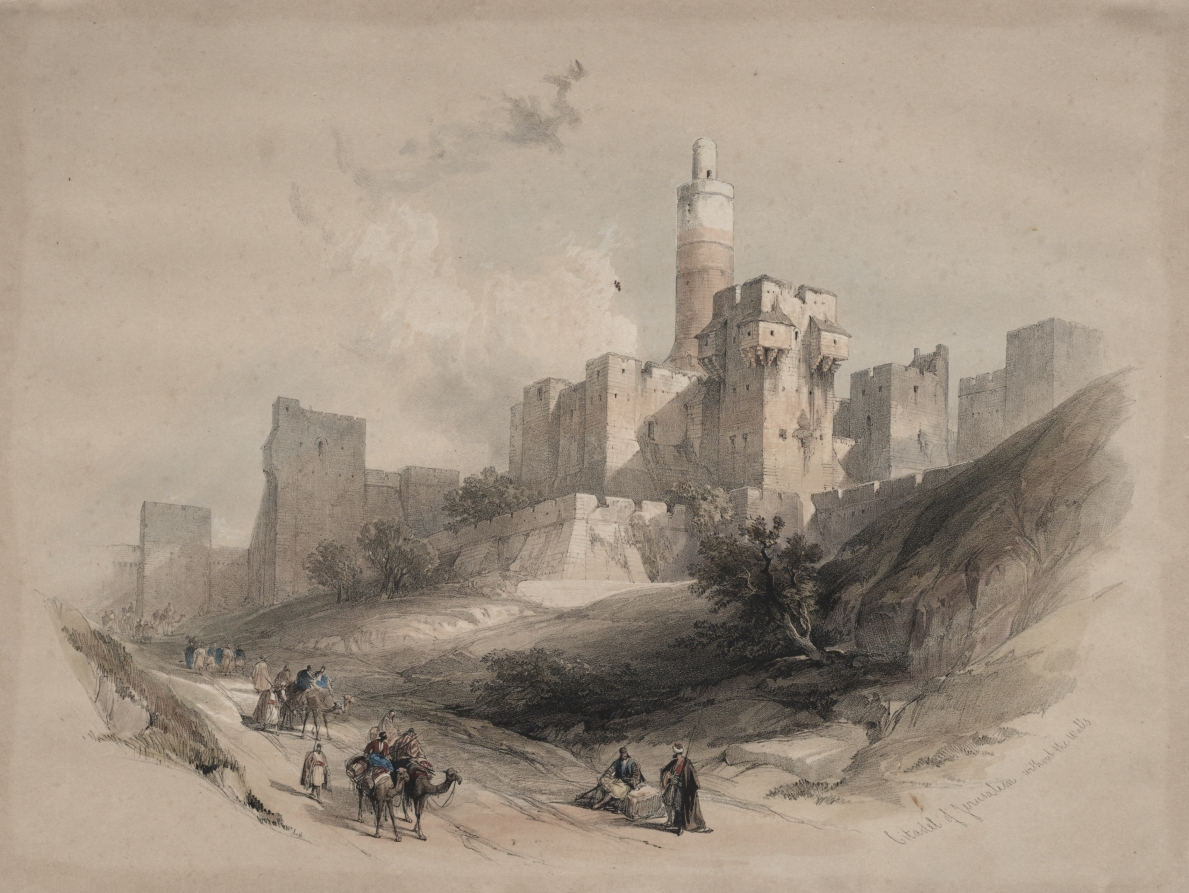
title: Citadel of Jerusalem, without the Walls, Tower of David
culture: England, 19th century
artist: David Roberts (Scottish, 1796–1864)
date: 1839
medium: color lithograph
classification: Print